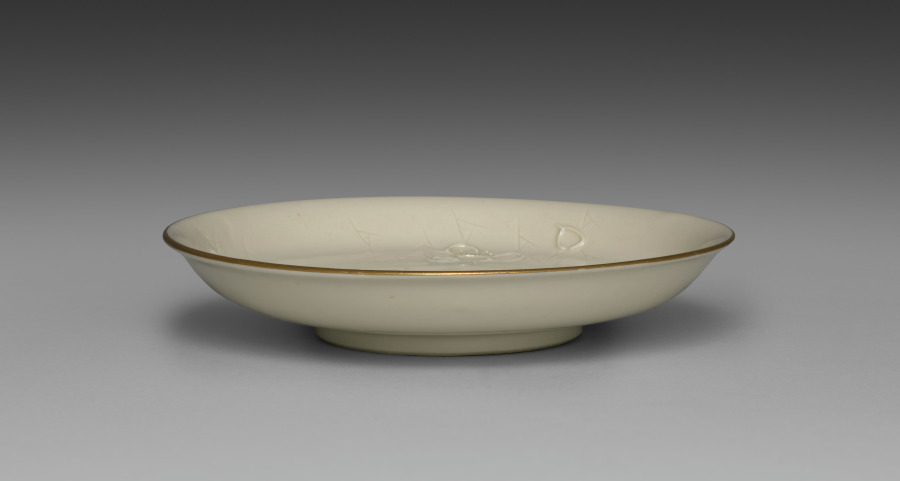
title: Medium-sized Dish from Dining Set with Plum Blossoms and Cracked-Ice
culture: Japan, Meiji period (1868–1912)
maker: Seifū Yohei II (Japanese, 1844–1878)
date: c. 1875–78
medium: Porcelain with molded designs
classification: Ceramic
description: Each item in this set has a delicate low-relief design of flowering plum branches over scattered, intersecting lines meant to resemble the cracked-ice surface of a frozen body of water and is signed on the base in gold pigment. While Yohei II produced many fine works in underglaze blue, like those produced by Kiyomizu Shichibei, he also made works in quite different styles later in his career, from the early 1870 s. In 1873, he was appointed purveyor to the Industrial Center of Kyoto Prefecture, a designation associated with Kyoto’s efforts to reach an international market through the port of Kobe; and from 1875 until his death, he was involved in national-level projects to present Japanese ceramics across the world. It was during this period that Yohei III was apprenticed to Yohei II, and it has been suggested that this set may in fact be an early example of Yohei III’s work, which he signed with his teacher’s name. Decorated with flowers resembling Japanese textile motifs, the set calls to mind the design of Yohei II’s pair of vases with plum blossoms in the Victoria and Albert Museum. Here, the elaborate trees created for a formal public exhibition setting have been translated into the approachable blossoms of the genteel domestic environment. While the designs are consistent across the pieces, each raised flower petal and pistil and each incised line in the ice was done by hand, so the cups, bowls, and dishes are similar yet unique. The bottoms of two boxes once identified the set’s owner, but the information has been deliberately obscured with black ink. However, inscriptions still visible appear to indicate two occasions, once at the end of July 1886 , and once again in June 1916 , when parts of the set were requested from Hokura in Niigata Prefecture. The location corresponds to a neighborhood in the present-day city of Jōetsu. The surname Tsuji 辻 also appears on a paper tag affixed to one of the box cloths. Future research may possibly reveal more about their provenance. A vase by Yohei III in a private collection combines the formal grandeur of the Yohei II vases in the Victoria and Albert Museum with the gentler design of this dining set, placing flowering plum trees against soft, scalloped-edge clouds resembling those in golden screens.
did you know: The dining wares have a creamy white coloration that the four boxes containing them identify as Korean in style.